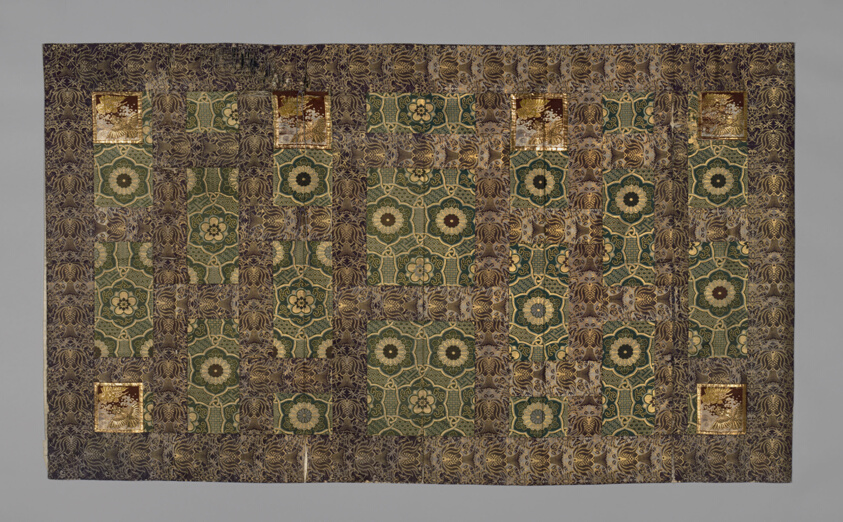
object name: Textile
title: Kesa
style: late edo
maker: Japan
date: late Edo period (1789–1868), 1800/50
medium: Heri, yô, shiten: silk and gold-leaf-over-lacquered-paper strip, warp-float faced 2:1 ‘Z’ twill weave with weft-float faced 1:2 ‘Z’ twill interlacings of secondary binding warps and supplementary patterning wefts; jô: silk and gold-leaf-over-lacquered-paper strip, warp-float faced 4:1 satin weave with supplementary patterning wefts and complementary self-patterning ground wefts bound in weft-float faced 1:9 satin interlacings; lining: silk, plain weave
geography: Japan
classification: textile; weaving; liturgical - buddhist